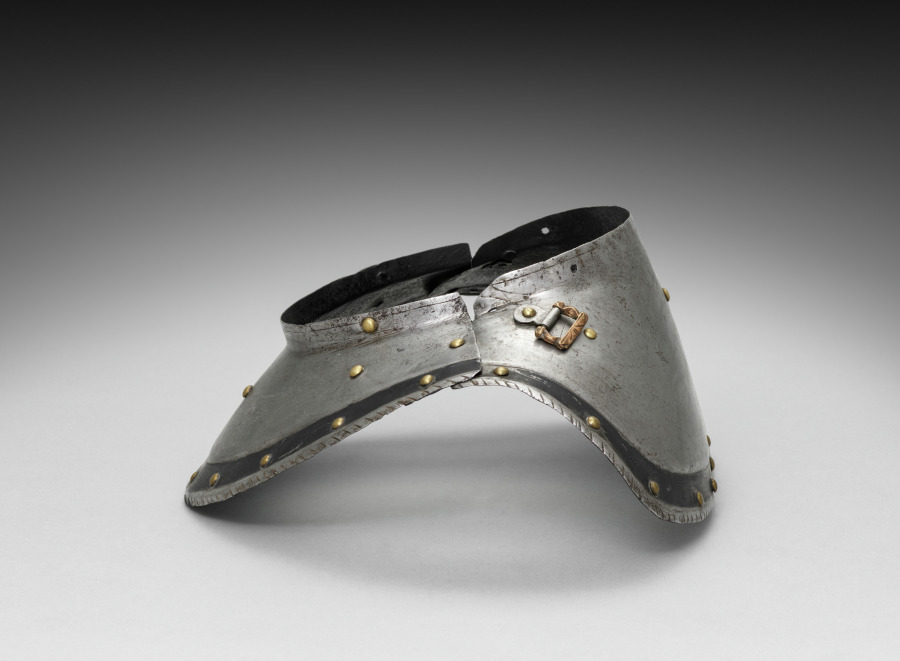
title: Colletin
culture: Germany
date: c.1550–1570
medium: iron, steel, leather and brass rivets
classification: Arms and Armor